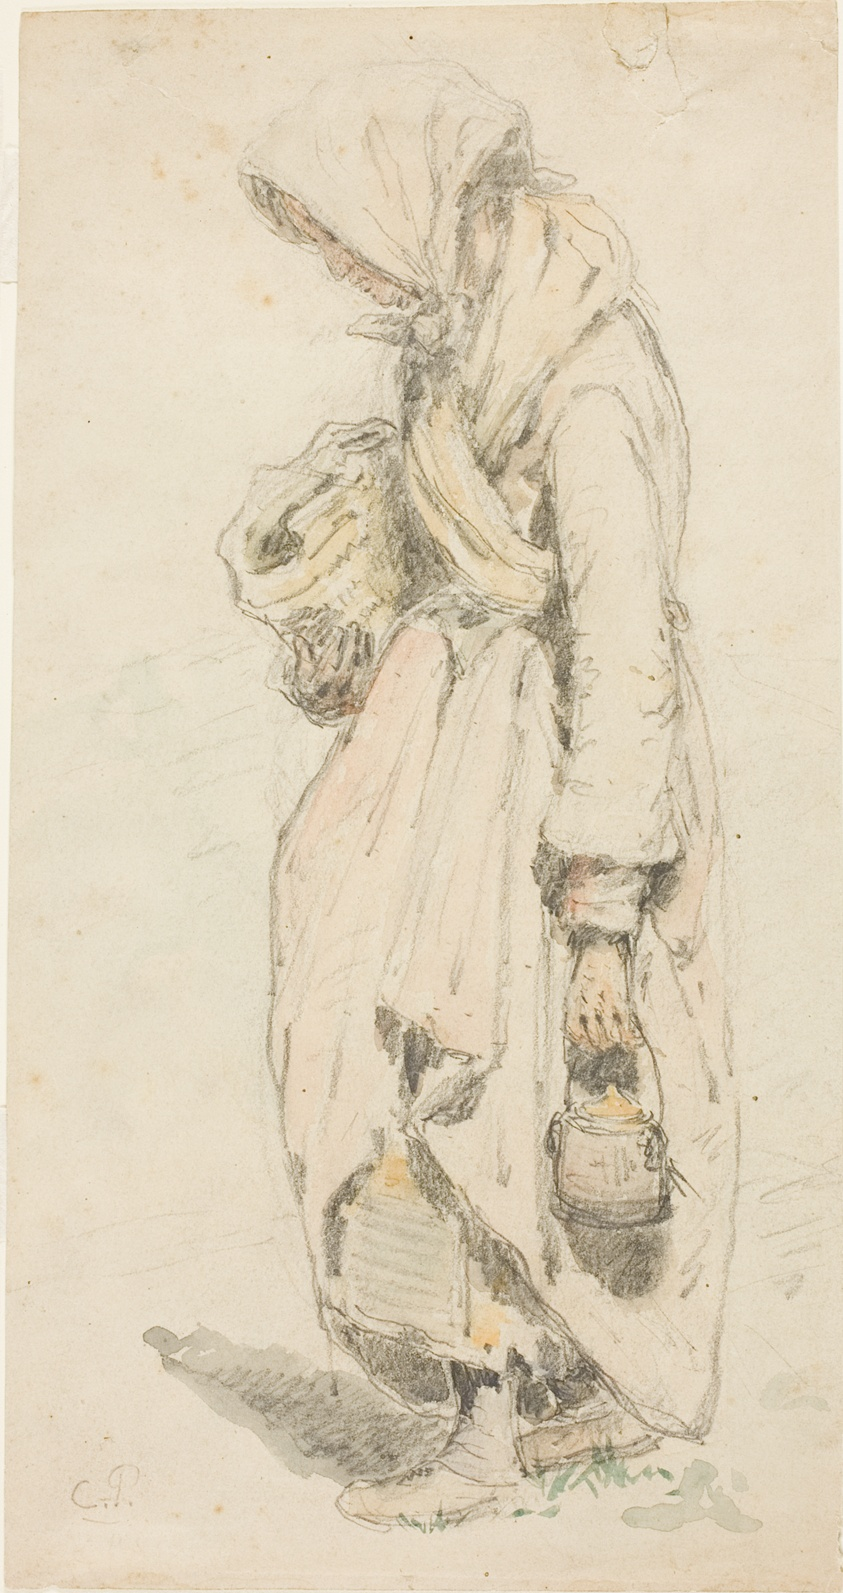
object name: Drawing and Watercolor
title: Peasant Woman (recto); Boy with a Fishing Pole (verso)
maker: Attributed to Camille Pissarro; French, 1830-1903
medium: Graphite, with watercolor (recto), and graphite (verso), on cream wove paper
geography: France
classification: graphite; drawings (visual works); prints and drawing